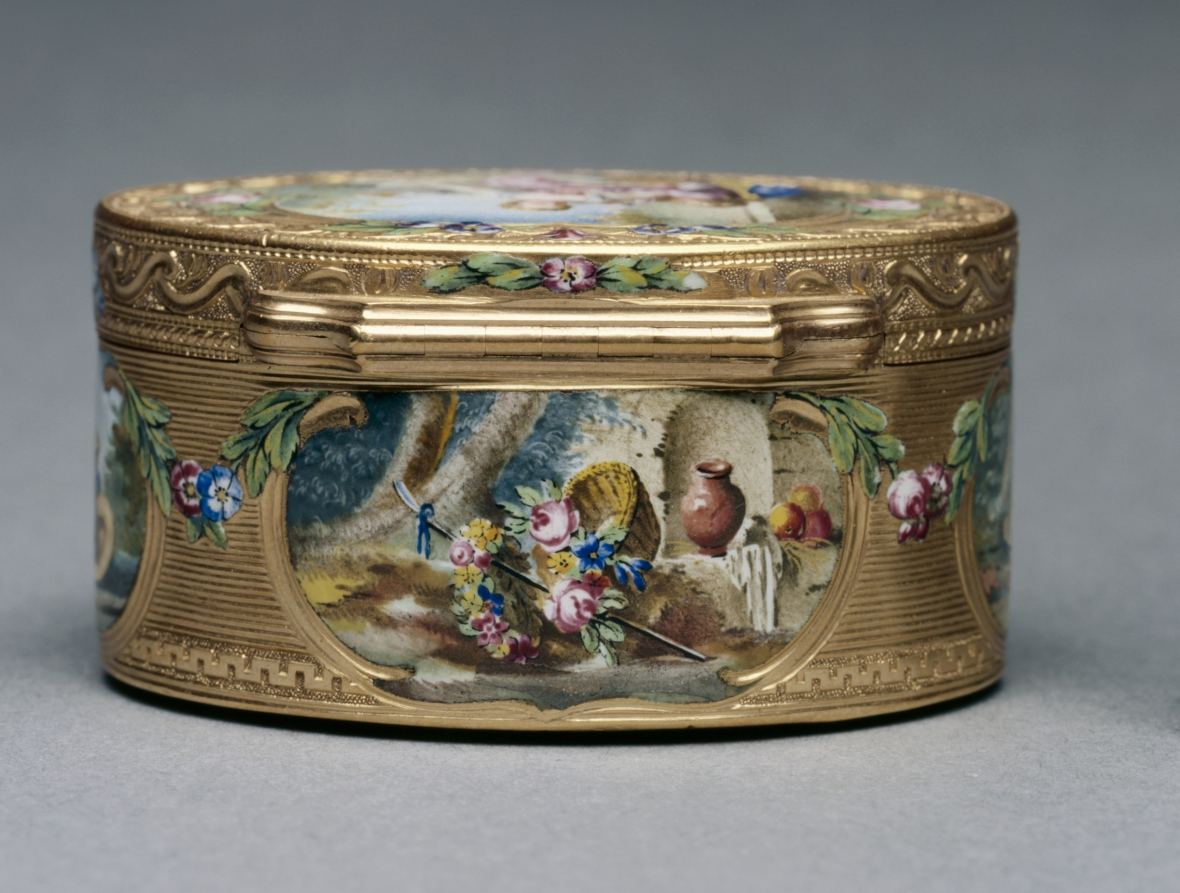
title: Snuff Box (Tabatière)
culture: France, 18th century (style of Louis XV)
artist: Francois Guillaume Tiron (French)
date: 1761–62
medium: gold and enamel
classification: Miscellaneous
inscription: [Maker's mark of Francois-Guillaume Tiron, master goldsmith in 1747, inside cover]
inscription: [Warden's mark, Paris, 1761-1762, inside cover]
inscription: [Charge mark of Eloi Brichard and Etienne Somfoye, Paris, 1756-1762, inside cover]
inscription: [Maker's mark of Francois-Guillaume Tiron, inside bottom]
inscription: [Warden's mark, 1761-1762, inside bottom]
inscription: [Charge mark of Brichard and Somfoye, inside bottom]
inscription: [Maker's mark of FG Tiron, left wall]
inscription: [Charge mark of Brichard and Somfoye, left wall]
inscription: [Warden's mark, Paris, 1761-1762, left wall]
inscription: [Discharge mark of J.J. Prevost, Paris, 1762-1768, bezel at right]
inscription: [Engraved number, maybe retailer's number]: "n. 13676"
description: The pastoral scenes that decorate this box are typical of the style of François Boucher, a celebrated painter of the period whose works were popularly reproduced on decorative arts. Snuff boxes, used practically as containers for powdered tobacco, were often decorated with miniature reproductions of notable works. The miniature on the cover is inspired by Boucher’s The Galant Pastor (Le Pasteur Gallant) (1738) and that on the bottom by The Amusement of the Shepherd Girl (L’Amusement de la Bergère) (1700s).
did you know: François Boucher was a favorite of the French royal court of Louis XV and named first painter of the king in 1765.